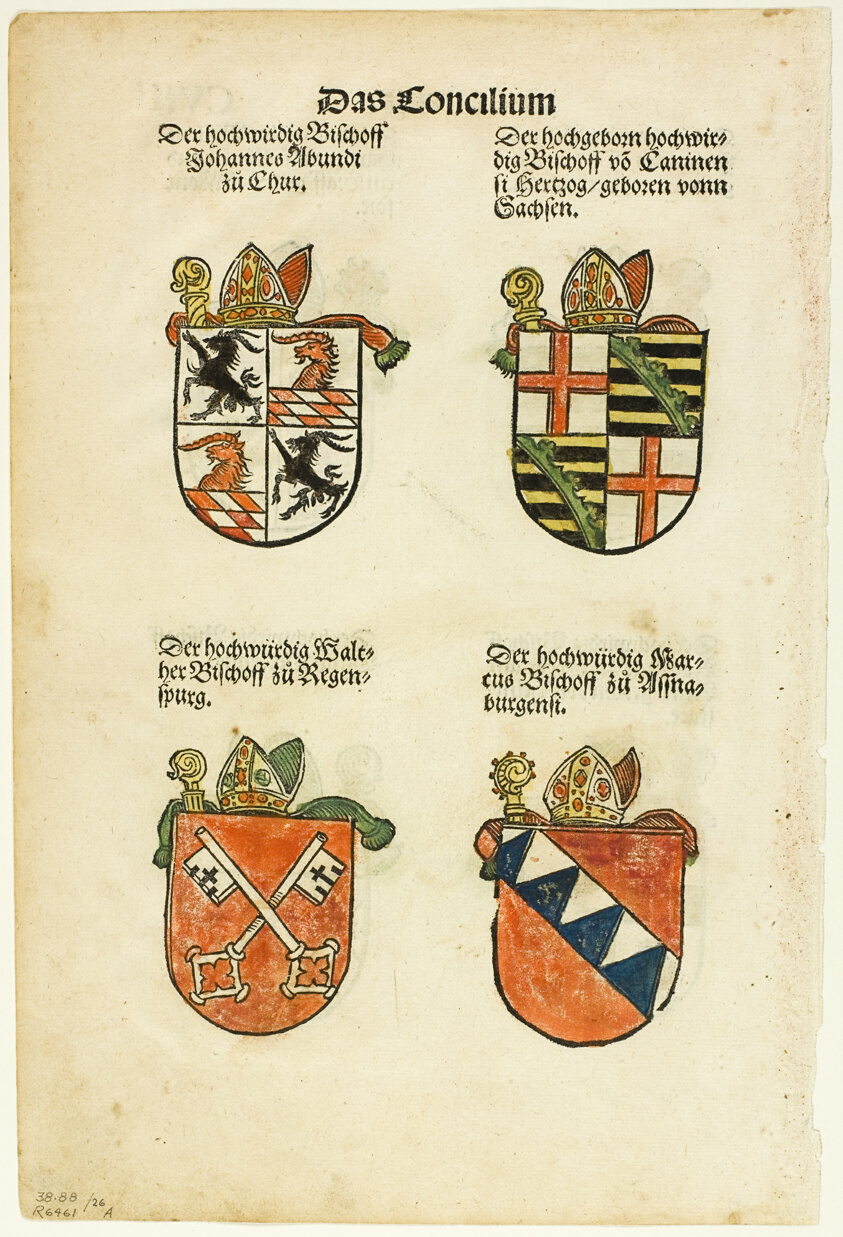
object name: Print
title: Coats of Arms of Bishops (recto and verso) from Das Concilium so zu Constantz, plate 26 from Woodcuts from Books of the XVI Century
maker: Jörg Breu, I (German, c.1480-1537); assembled by Max Geisberg (Swiss, 1875-1943)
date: 1536, assembled into portfolio 1937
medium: Hand-colored woodcut on paper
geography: Germany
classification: woodcut; print; prints and drawing